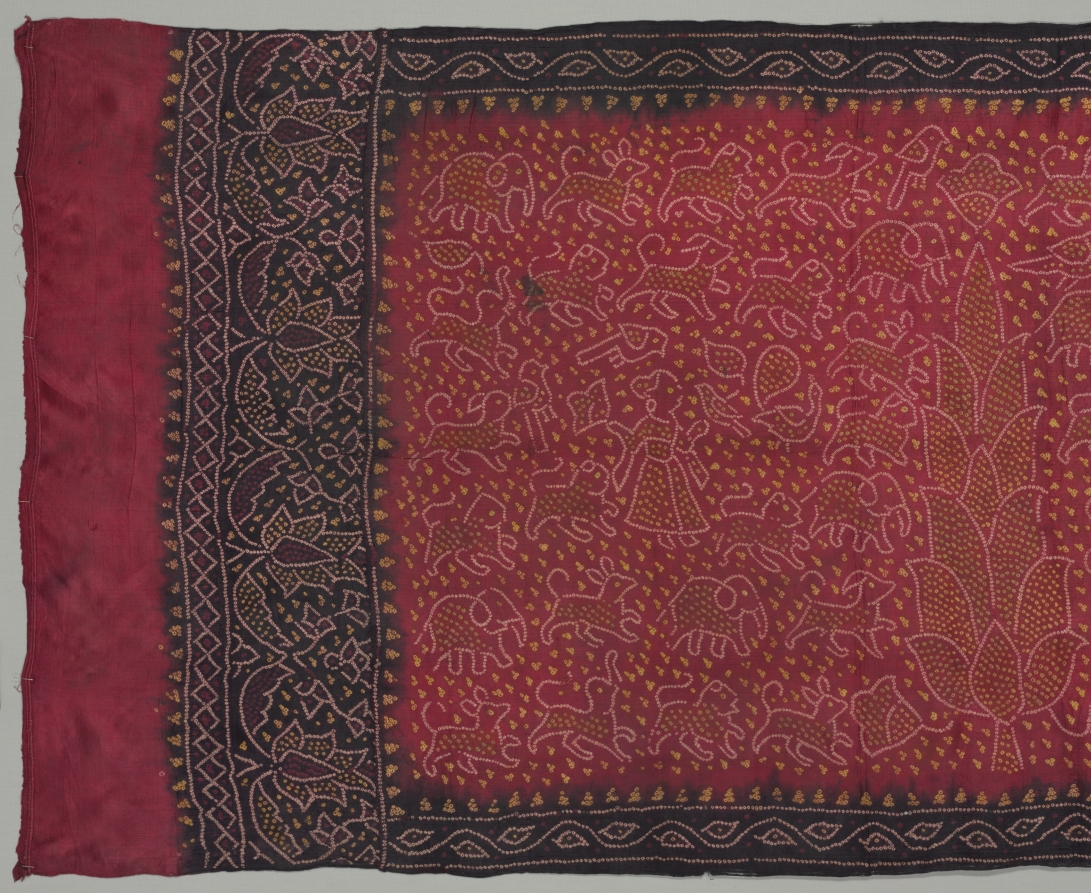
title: Sari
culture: India, Gujarat, 19th century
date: 1800s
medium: satin, tied and dyed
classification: Textile